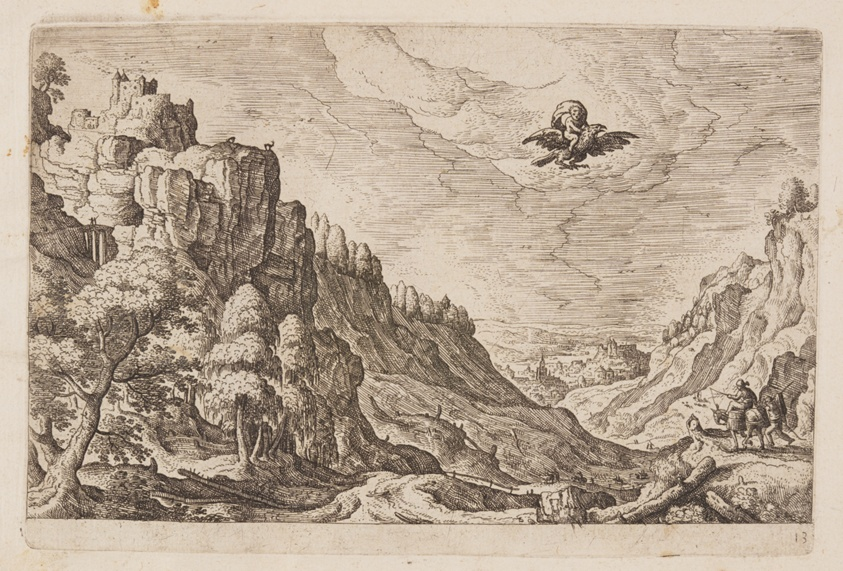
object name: Print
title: Plate 13, from Landscapes with Scenes from the Old and New Testament and Ovid’s Metamorphoses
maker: Hans Bol (Flemish, 1534–1593); published by Philip Galle (Flemish, 1537–1612)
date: 1574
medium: Etching on ivory laid paper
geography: Flanders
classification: print; paper; prints and drawing; etching